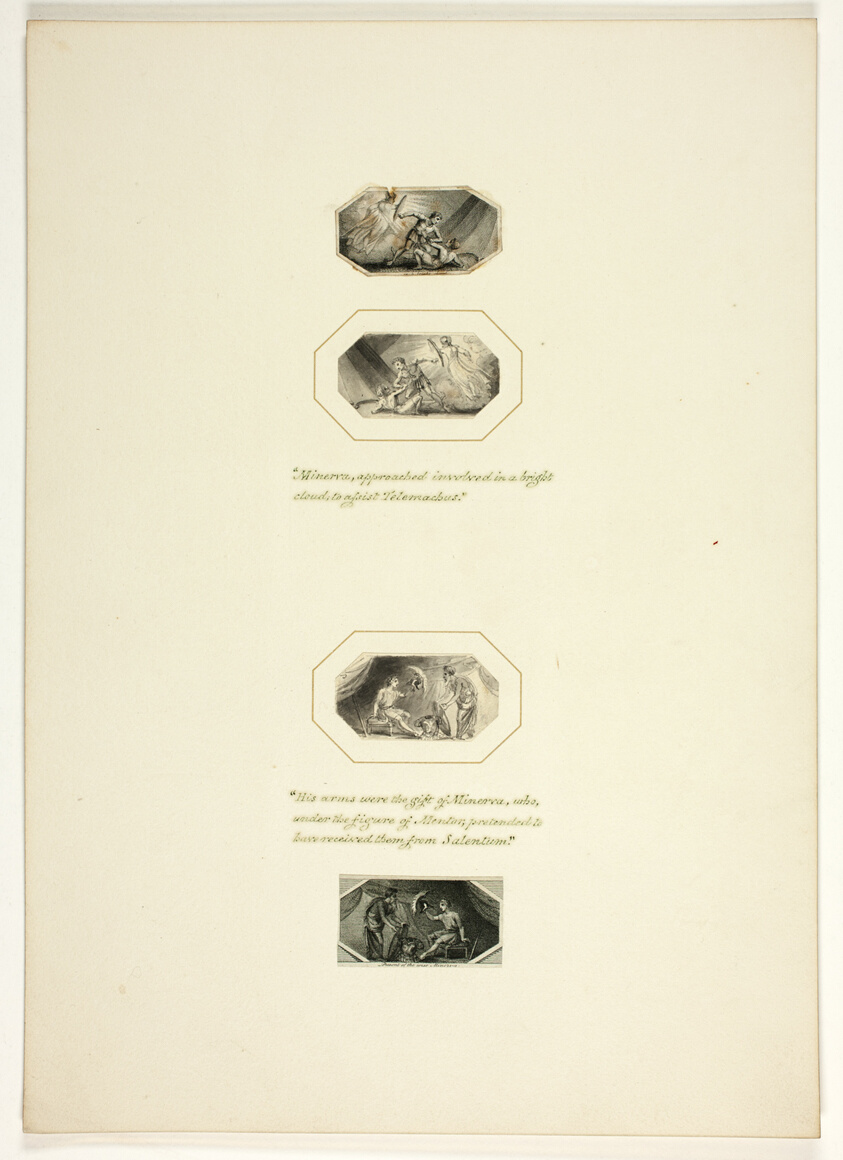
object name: Drawing and Watercolor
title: Study for a plate from Telemachus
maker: Thomas Stothard (English, 1755-1834)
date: c. 1797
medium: Ink wash on paper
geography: England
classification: ink or chalk wash; drawings (visual works); prints and drawing